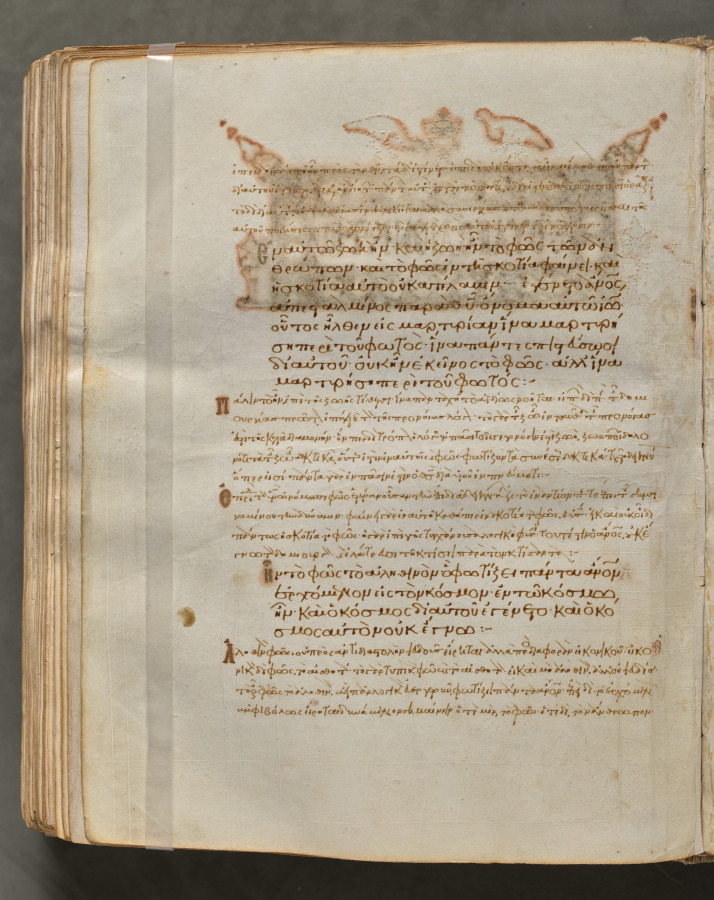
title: Text, folio 324 (verso), from a Gospel Book with Commentaries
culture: Byzantium, Constantinople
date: c. 1000–1100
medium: ink, tempera, and gold on vellum; leather binding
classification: Bound Volume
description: Each of the four gospels in this book opens on a page with brilliantly illuminated borders depicting the author of the text as well as birds—principally peacocks, symbols of the immortality of the soul—and fountains, representing the fountain of life and the salvation of the soul. This volume consists of 428 leaves with texts in Greek. Its level of sophistication suggests that it was probably written and decorated in a monastery in Constantinople.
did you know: Gospel books were carried in procession through Byzantine churches.